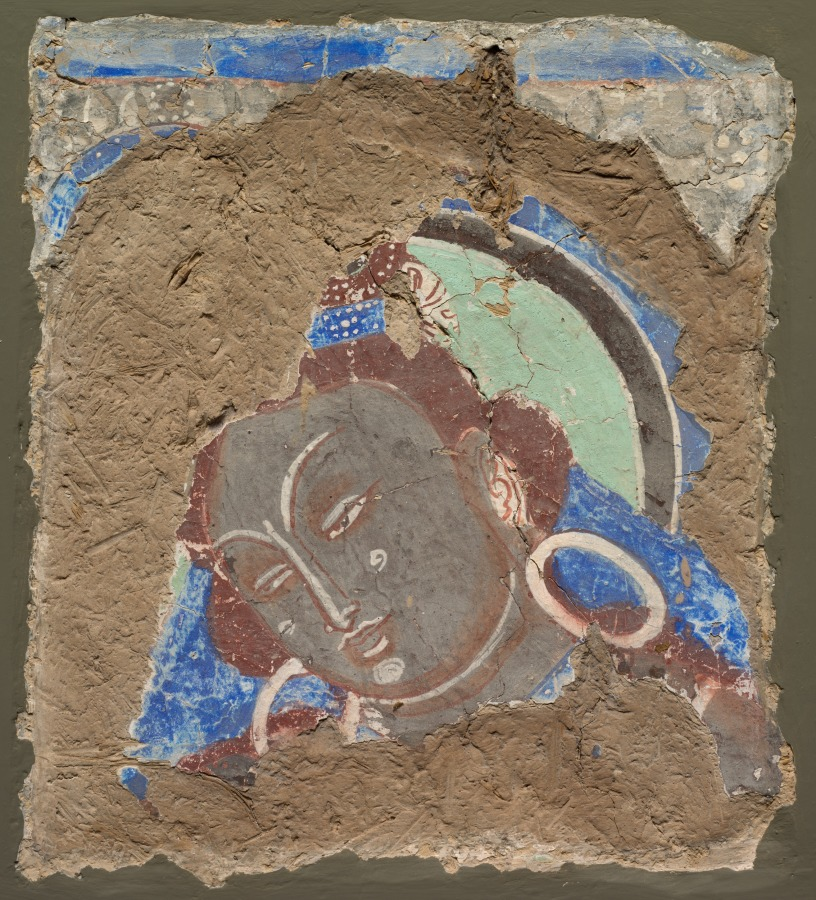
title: Fragment with a Head of Bodhisattva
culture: Central Asia, Kizil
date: 600–650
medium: fresco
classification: Painting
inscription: "Zur Errinerung" "Albert von Le Coq" "9/12/19" "the third group of caves, cave no. 60" "the fourth expedition" "Kizil"